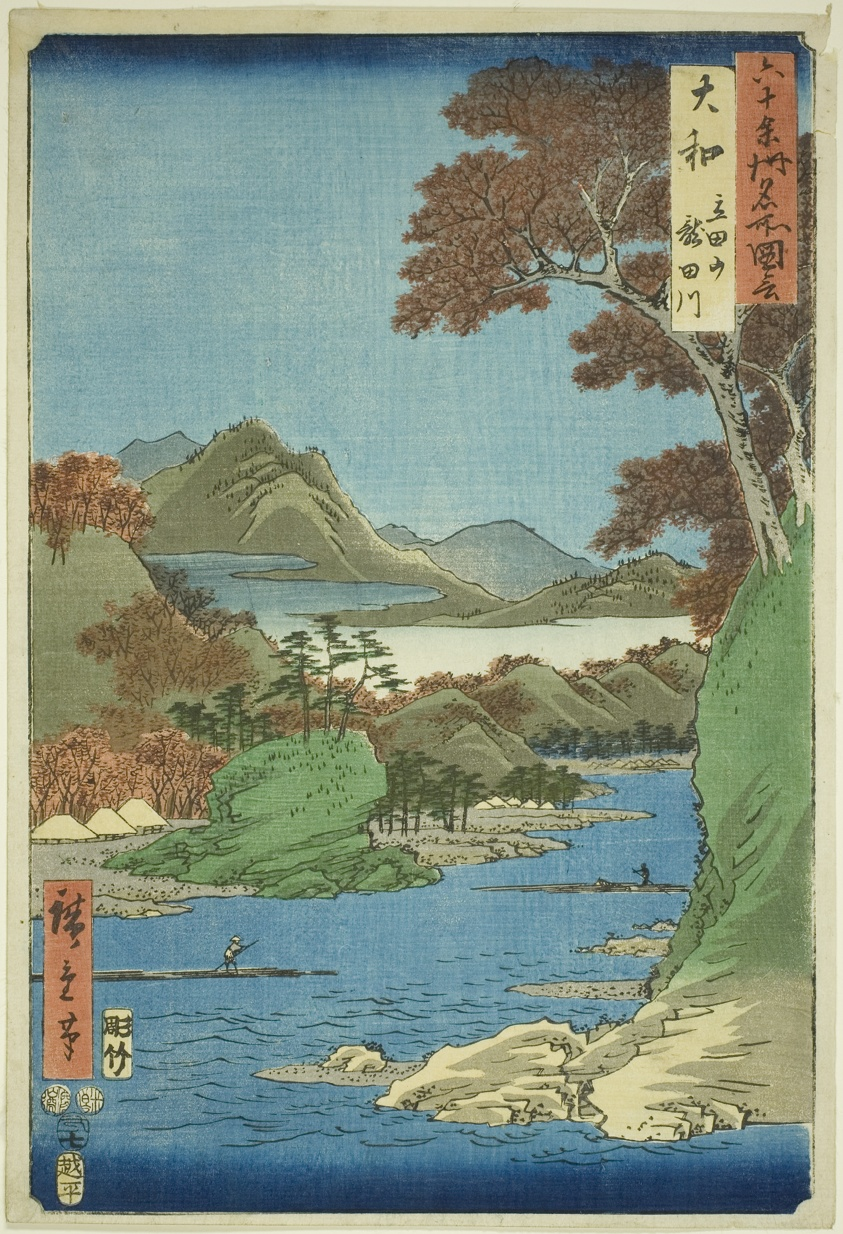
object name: Print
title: Yamato Province: Tatsuta Mountain and Tatsuta River (Yamato, Tatsutayama, Tatsutagawa), from the series "Famous Places in the Sixty-odd Provinces (Rokujuyoshu meisho zue)""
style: Japanese (culture or style)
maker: Utagawa Hiroshige 歌川 広重; Japanese, 1797-1858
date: 1853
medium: Color woodblock print; oban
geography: Japan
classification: woodblock print; print; asian art